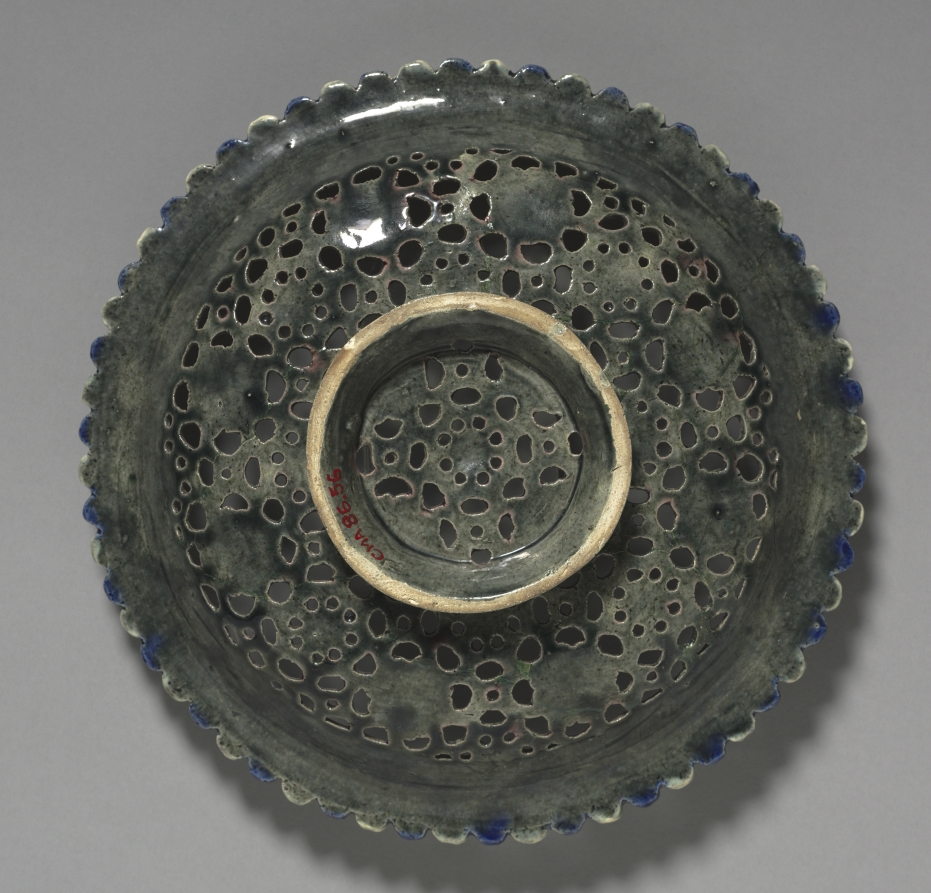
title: Dish with Open Work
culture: France, 16th century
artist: circle of Bernard Palissy (French, 1510–1589)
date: late 1500s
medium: lead-glazed earthenware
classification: Ceramic